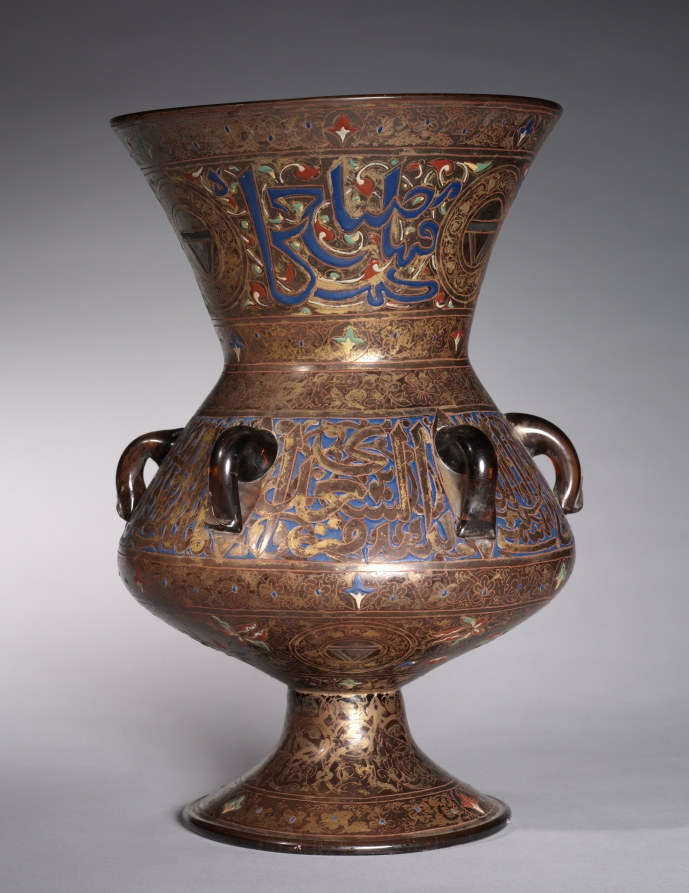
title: Mosque Lamp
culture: France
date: late 1800s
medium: glass with enameled and gilded decoration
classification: Glass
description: In late 1800s Europe, there was a renewed interest in art from the Islamic world. Mosque lamps, made for Mamluk rulers and their high officials in the 1300s, were particularly prized. Phillippe-Joseph Brocard, a Parisian collector and craftsman, is renowned for reviving the Mamluk technique of enameling and gilding glass and produced many lamp reproductions. This lamp used to be in his collection and it is possible that it was made by him. The top Qur’anic inscription likens divine light to a shining glass lamp.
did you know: This colorful lamp would have been suspended by its six handles. When lowered to refill its oil, it could stand securely on its splayed foot.